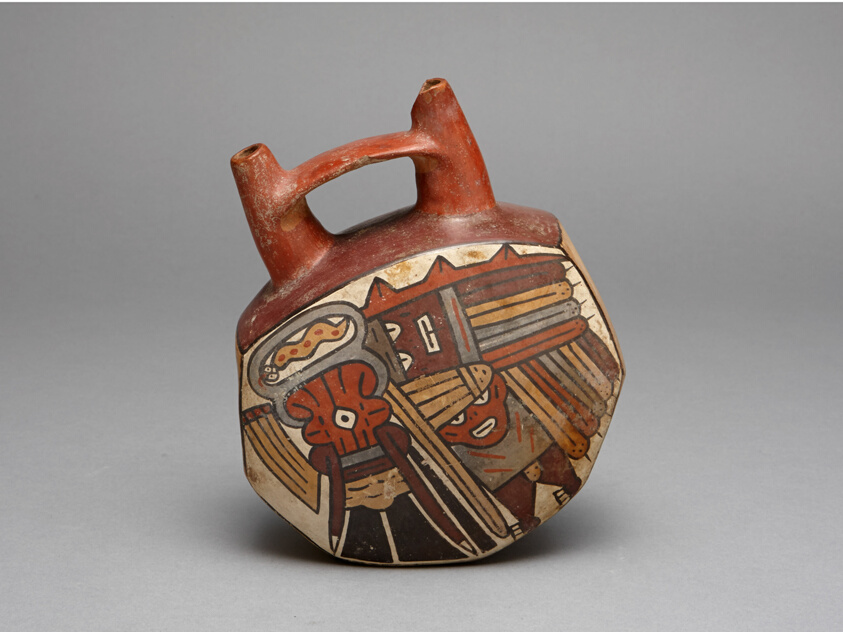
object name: Vessel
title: Geometric Bridge Vessel Depicting Ritual Performer Wearing Abstract Bird Costume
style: nazca, early intermediate period, Pre-Columbian, americas, Arts of the Americas, andean, andes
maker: Nazca; South coast, Peru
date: 180 BCE–500 CE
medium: Ceramic and pigment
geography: Peru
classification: earthenware; art of the americas; ceramics; vessel